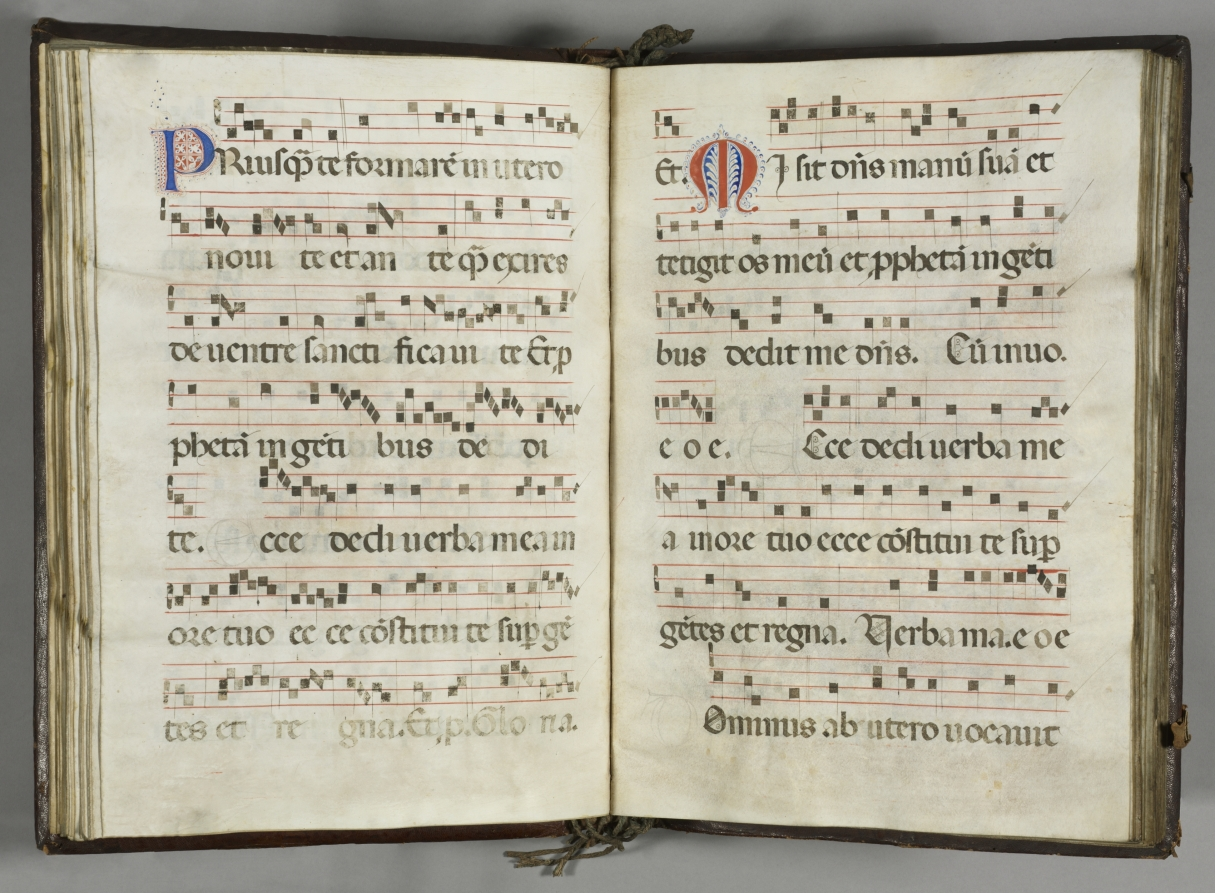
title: Choir Book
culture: Italy, 16th century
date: 1500s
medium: leather binding, copper alloy buckles, lead seal, parchment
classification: Manuscript